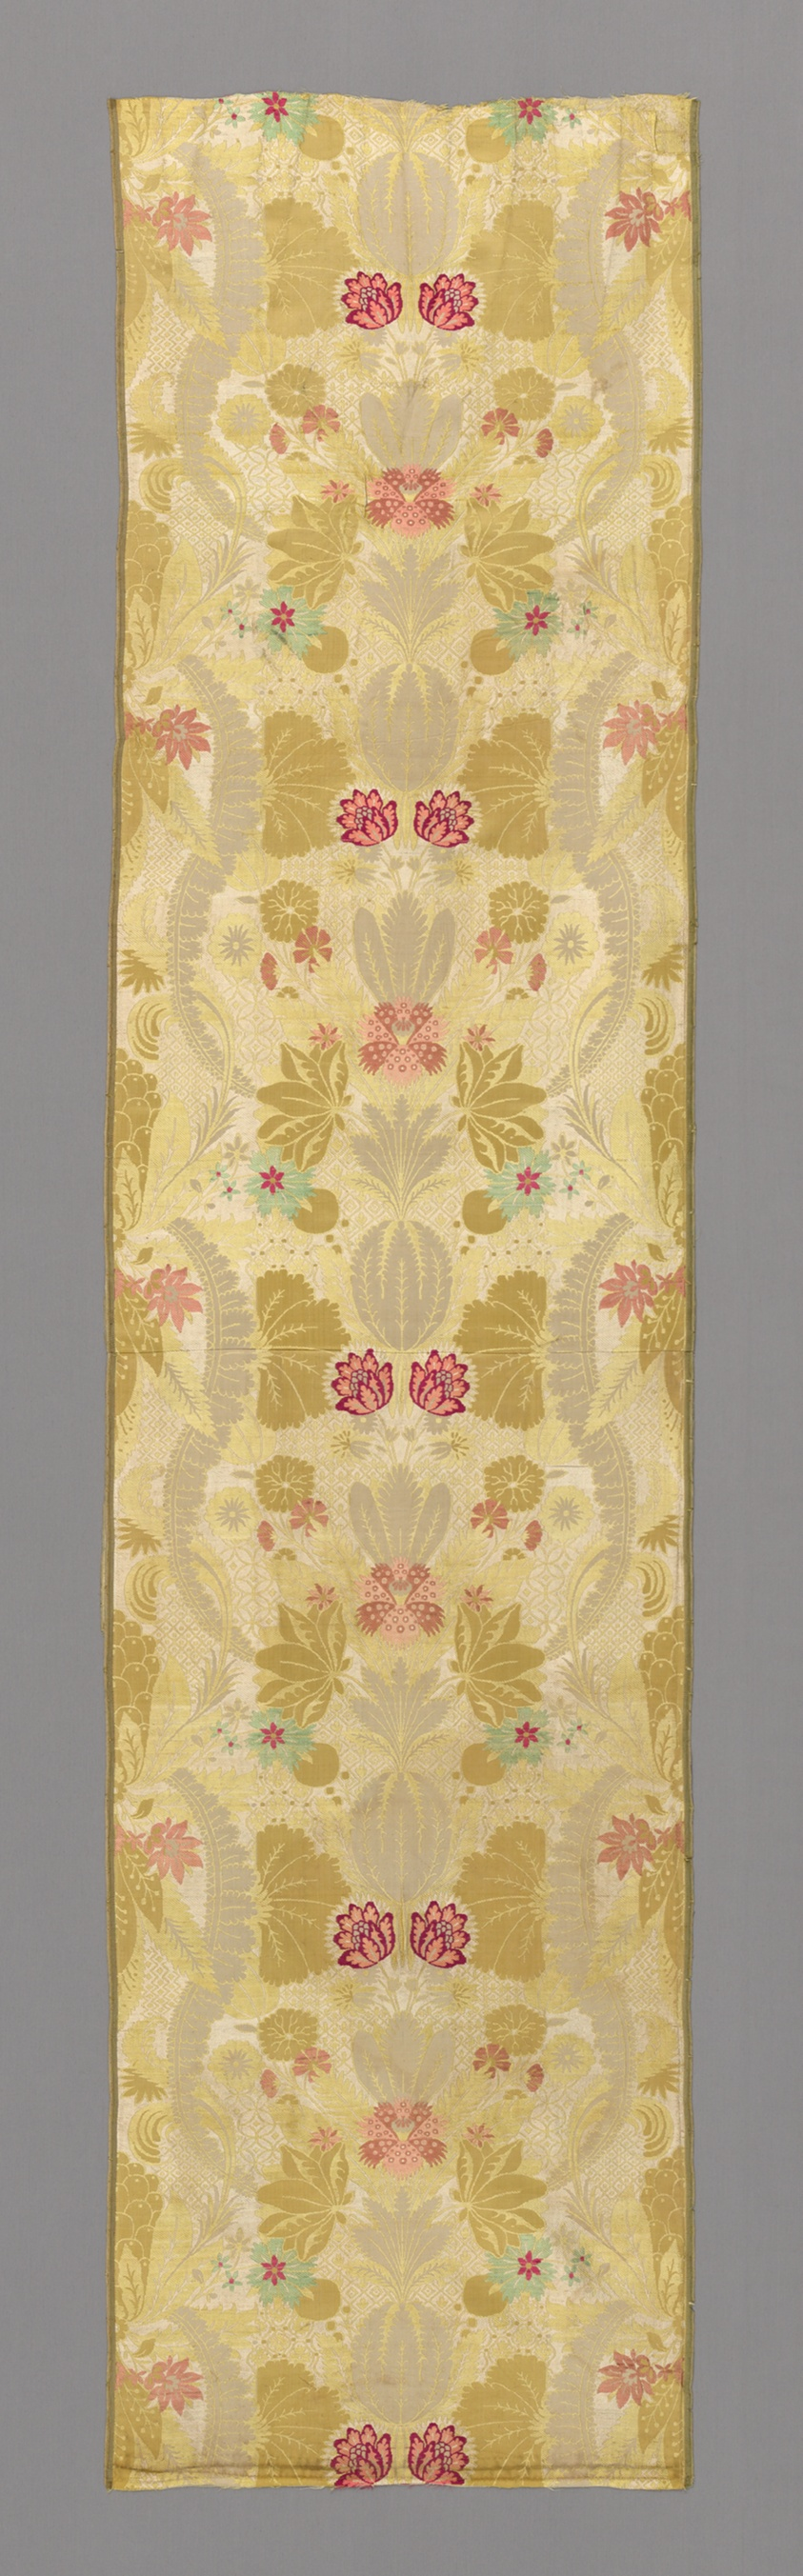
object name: Textile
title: Panel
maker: England, Spitalfields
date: 1720/25 (probably 1723/24)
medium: Silk, warp-float faced 7:1 satin weave with supplementary binding warps tying supplementary brocading wefts and self-patterning ground wefts in weft-float faced 3:1 twill interlacing; two panels and one fragment pieced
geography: England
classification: textile; weaving